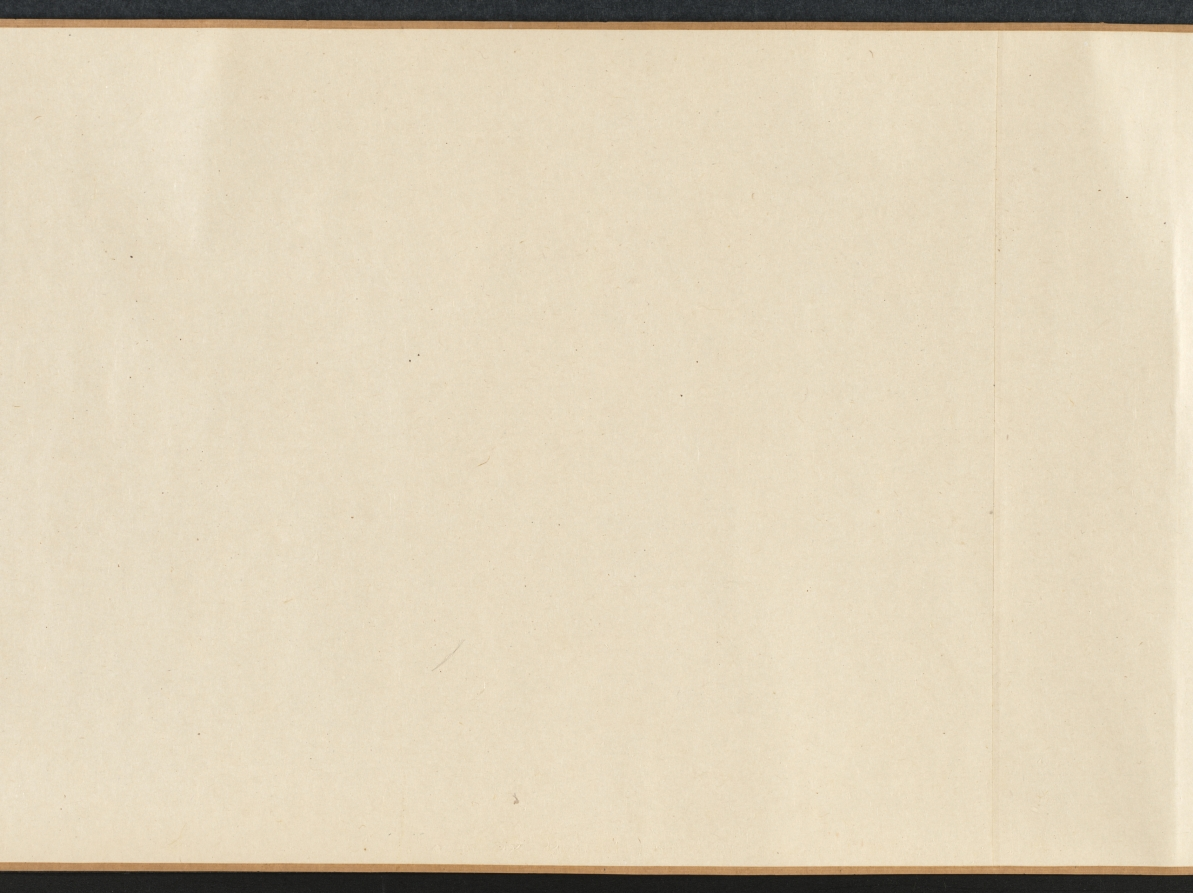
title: Landscape with Bamboo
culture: China, Yuan dynasty (1271-1368)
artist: Song Ke (Chinese, 1327–1387)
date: 1300s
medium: Handscroll; ink on paper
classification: Painting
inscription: 東吳宋克戲為仲幾畏友圖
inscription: 2 colophons and 14 additional seals: 1 seal of Yü Chung-chi (14th c.); 1 seal of Wu Ch'eng (1469 jinshi); 1 colophon and 2 seals of Wu K'uan (1435–1504); 1 colophon and 9 seals of Cheng Qi (1911–1988); 1 seal unidentified.